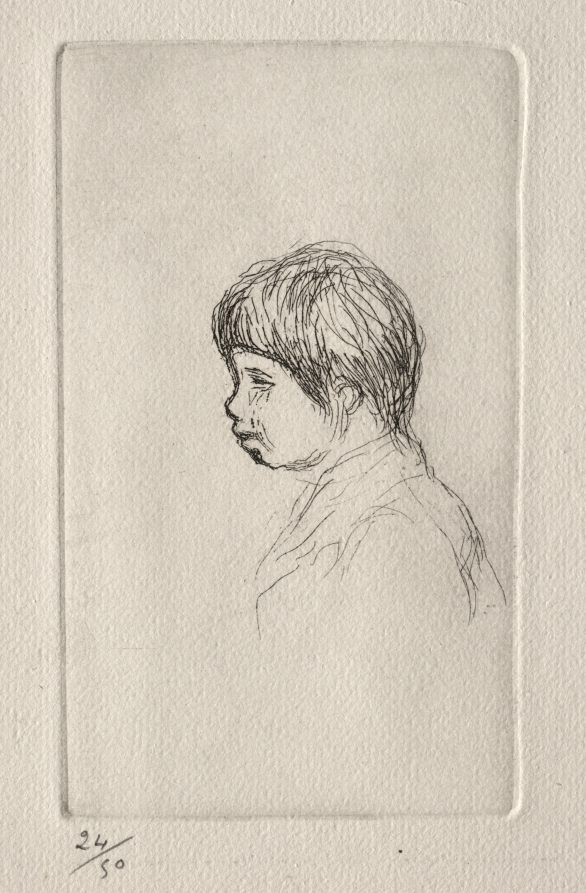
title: Claude Renoir, the Artist's Son, in Profile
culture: France, late 19th-early 20th century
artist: Pierre-Auguste Renoir (French, 1841–1919)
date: 1908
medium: etching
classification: Print